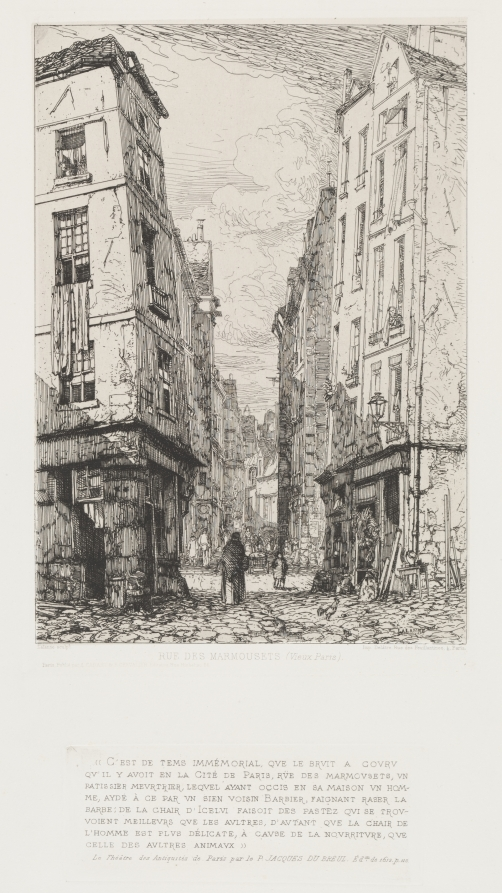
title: Rue des Marmousets (Old Paris)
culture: France, 19th century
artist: Maxime Lalanne (French, 1827–1886)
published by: A Cadart & F. Chevalier, rue Richelieu, 66 Paris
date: 1862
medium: etching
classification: Print